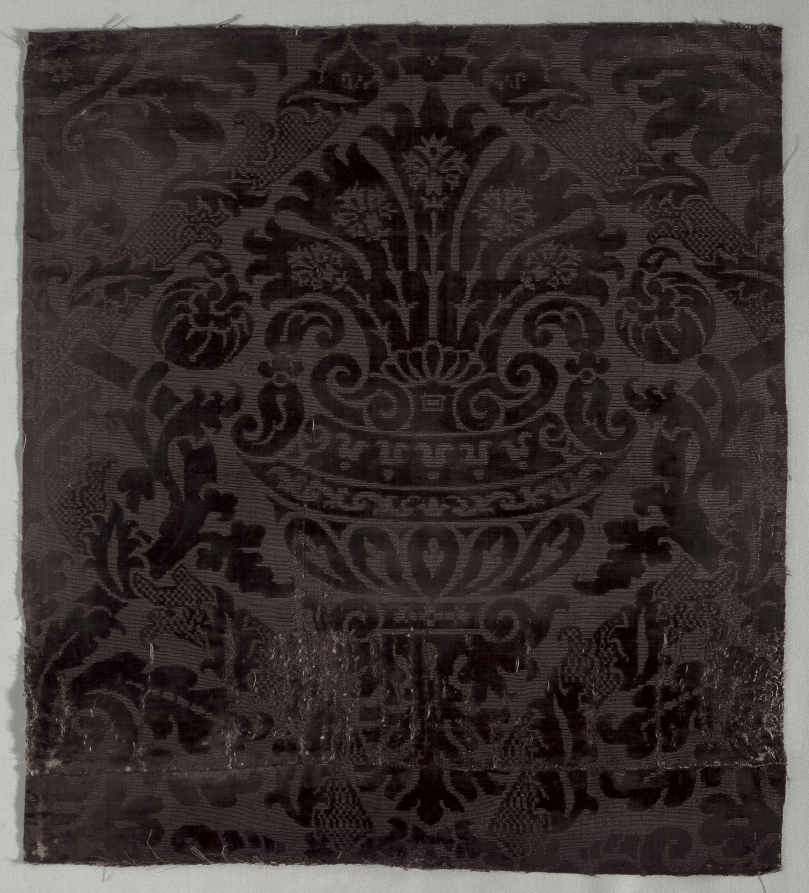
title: Velvet Textile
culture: Italy, late 16th century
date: late 1500s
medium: velvet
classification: Velvet